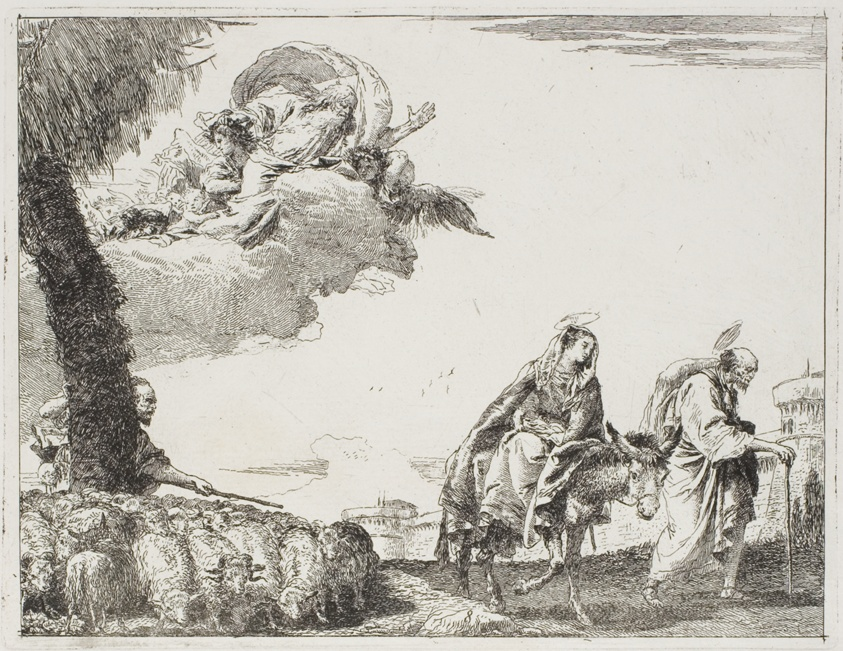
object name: Print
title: The Holy Family Walking Along a City Wall. On the left, a Shepherd with his Flock and God the Father, plate eight from The Flight into Egypt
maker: Giovanni Domenico Tiepolo (Italian, 1727-1804)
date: 1753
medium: Etching on paper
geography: Italy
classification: etching; print; prints and drawing